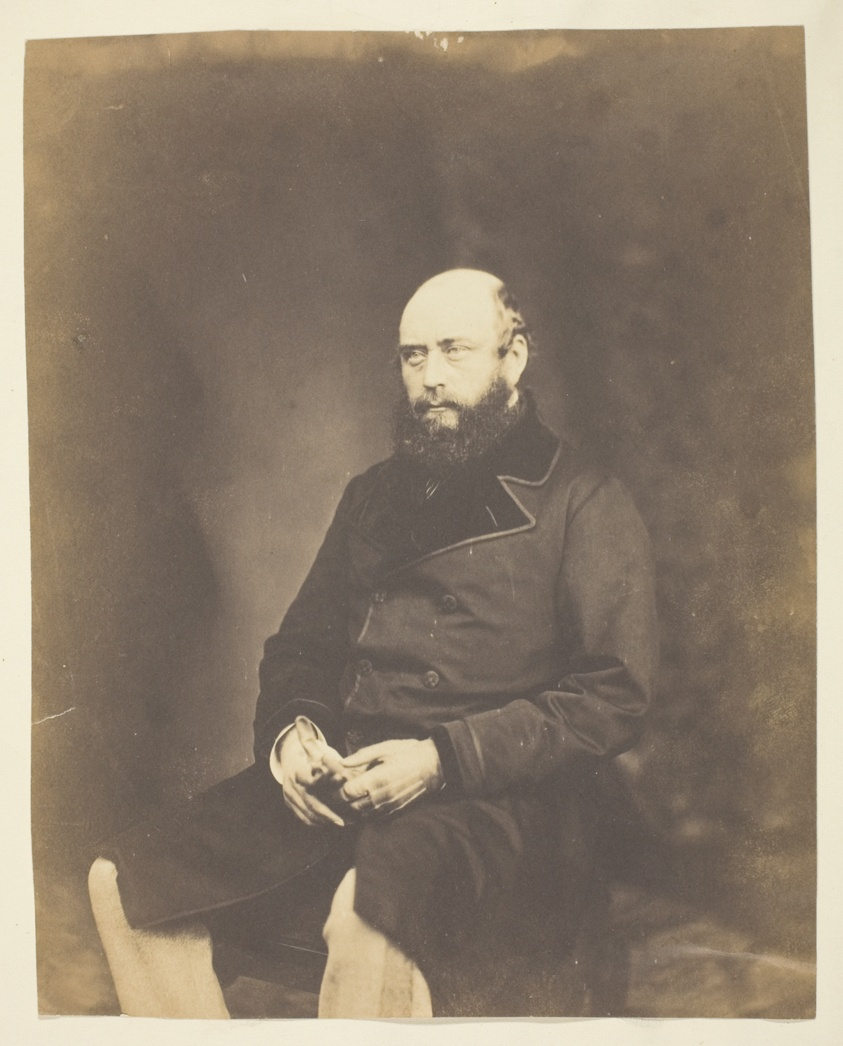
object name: Photograph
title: George, Duke of Cambridge (1819-1910), Field Marshal; Crimea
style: 19th century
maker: Roger Fenton (English, 1819–1869)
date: 1855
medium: Thinly albumenized print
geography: England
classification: albumen silver print; photographic process; photography; photograph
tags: Collected by Hugh Edwards